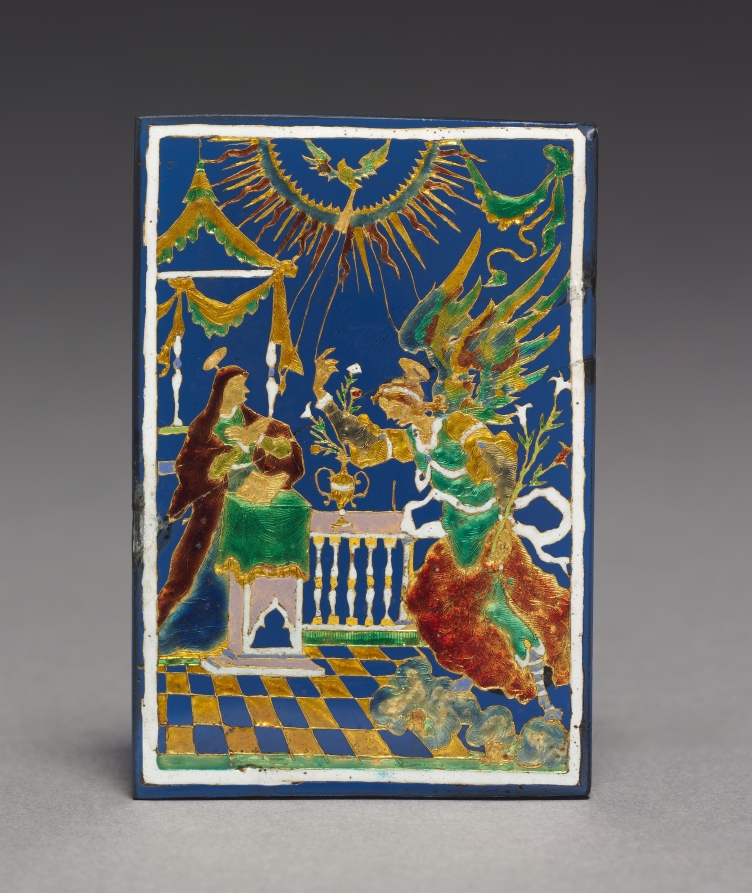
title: The Annunciation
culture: Germany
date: c. 1625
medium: enamel on glass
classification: Glass